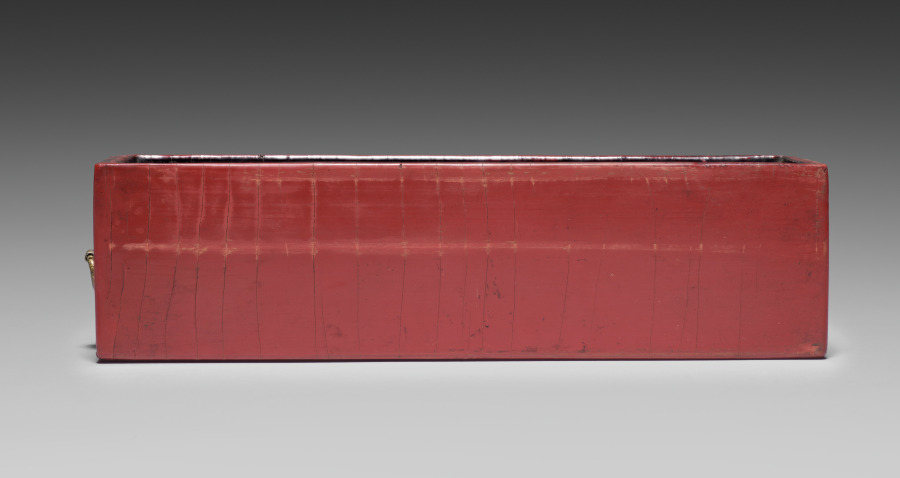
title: Drawer for a Tihong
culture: China, Ming dynasty (1368-1644), Wanli reign (1572-1620)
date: 1585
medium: carved cinnabar lacquer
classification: Lacquer